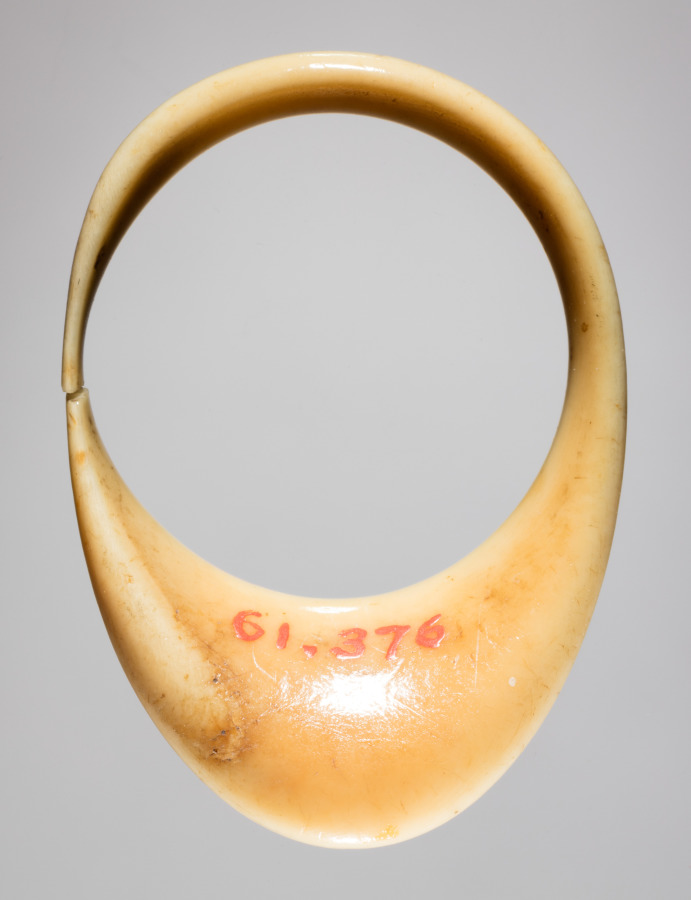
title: Ring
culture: Iran, early Islamic period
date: 700s - 900s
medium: bone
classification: Miscellaneous